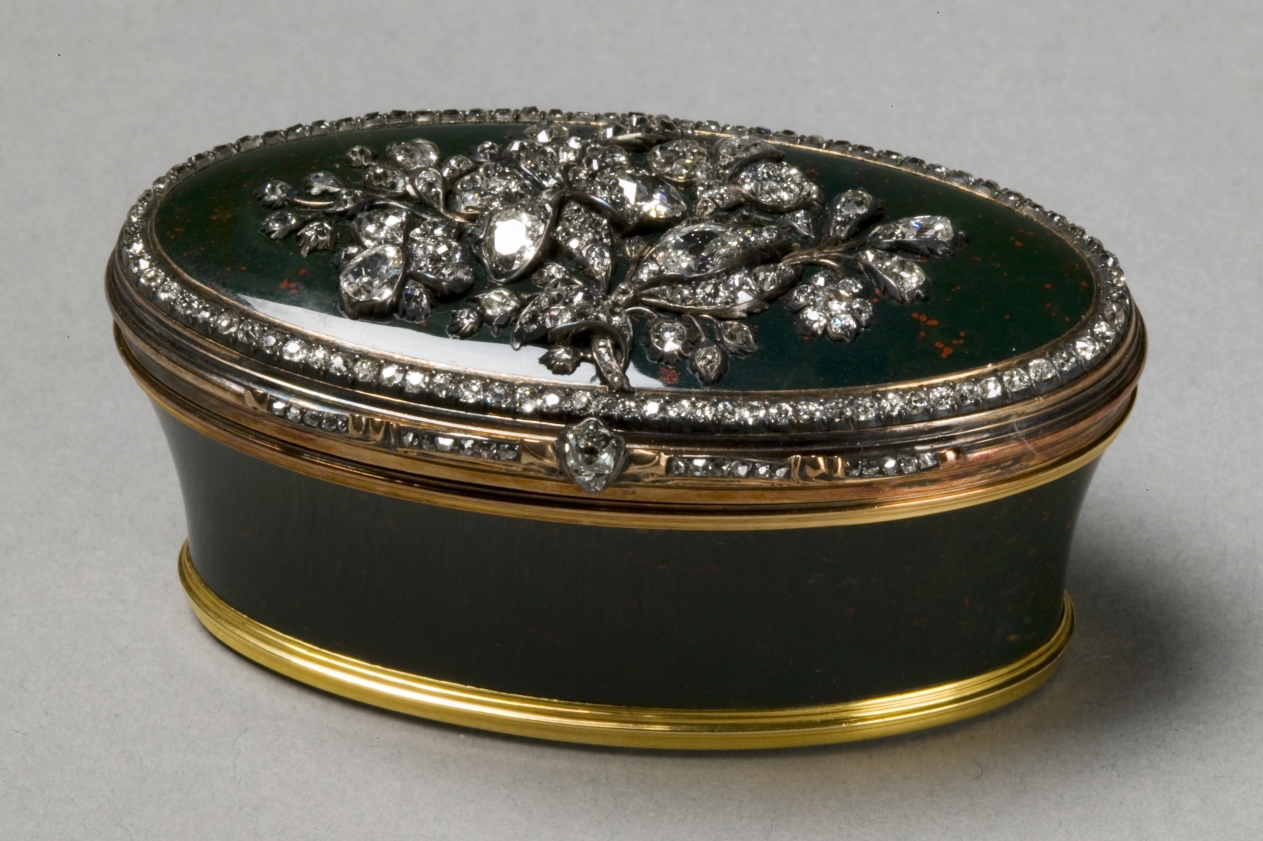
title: Snuff Box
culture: Russia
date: c. 1750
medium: gold-mounted bloodstone, diamonds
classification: Miscellaneous